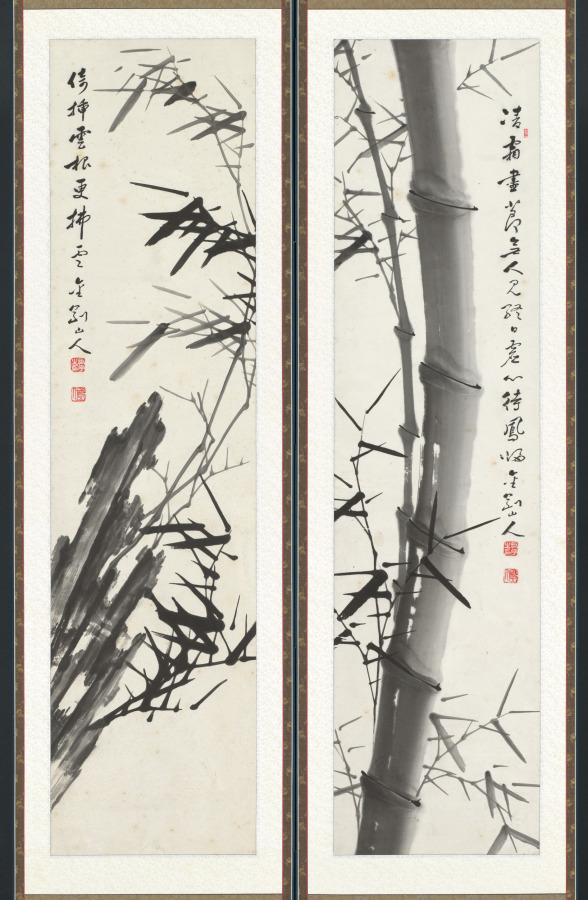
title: Bamboos in Wind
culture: Korea, Japanese colonial period (1910−1945)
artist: Kim Jin-woo (Korean, 1883–1950)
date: 1934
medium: Ten-panel folding screen; ink on paper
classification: Painting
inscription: Two chops stamped on each panel: 振宇之印 (Jinwoo’s Seal); 金剛山人 (Diamond Mountain Man)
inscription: Inscription written on the far-left panel: 甲戌流??寫於竹林堂金剛山人振宇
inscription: Inscription written on the 8th panel: 五百間淸風金剛山人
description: Active during the Japanese colonial period in Korea (1910–45), the artist Jin-woo Kim earned his artistic reputation for his expressive renditions of bamboo swaying in a strong wind. His piercing bamboo shoots are often compared to an iron spear, and their sharp leaves to a knife. It is believed that he deliberately emphasized sharpness in his brushstrokes to express his strong resistance against Japanese colonial oppression.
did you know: The artist’s prolific artistic production were a major part of fundraising efforts to support resistance activities for Korea’s independence.